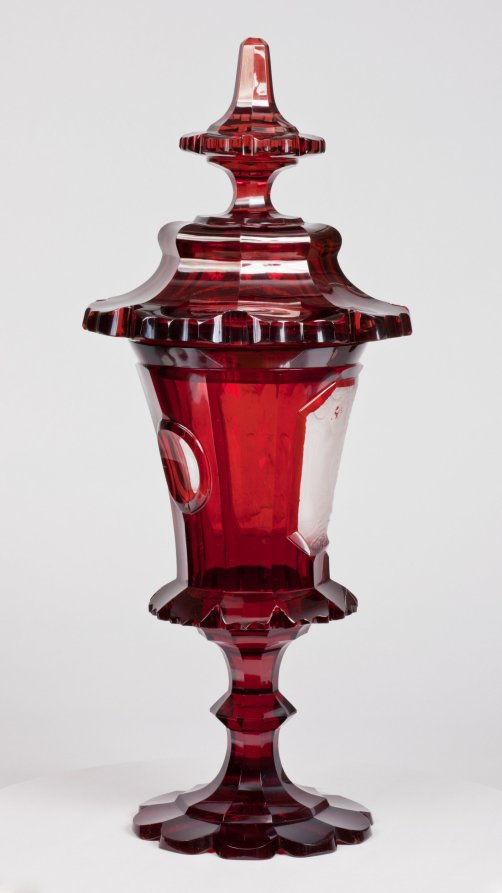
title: Covered Cup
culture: Bohemia, 19th century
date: mid-1800s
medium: ruby glass with engraved decoration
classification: Glass